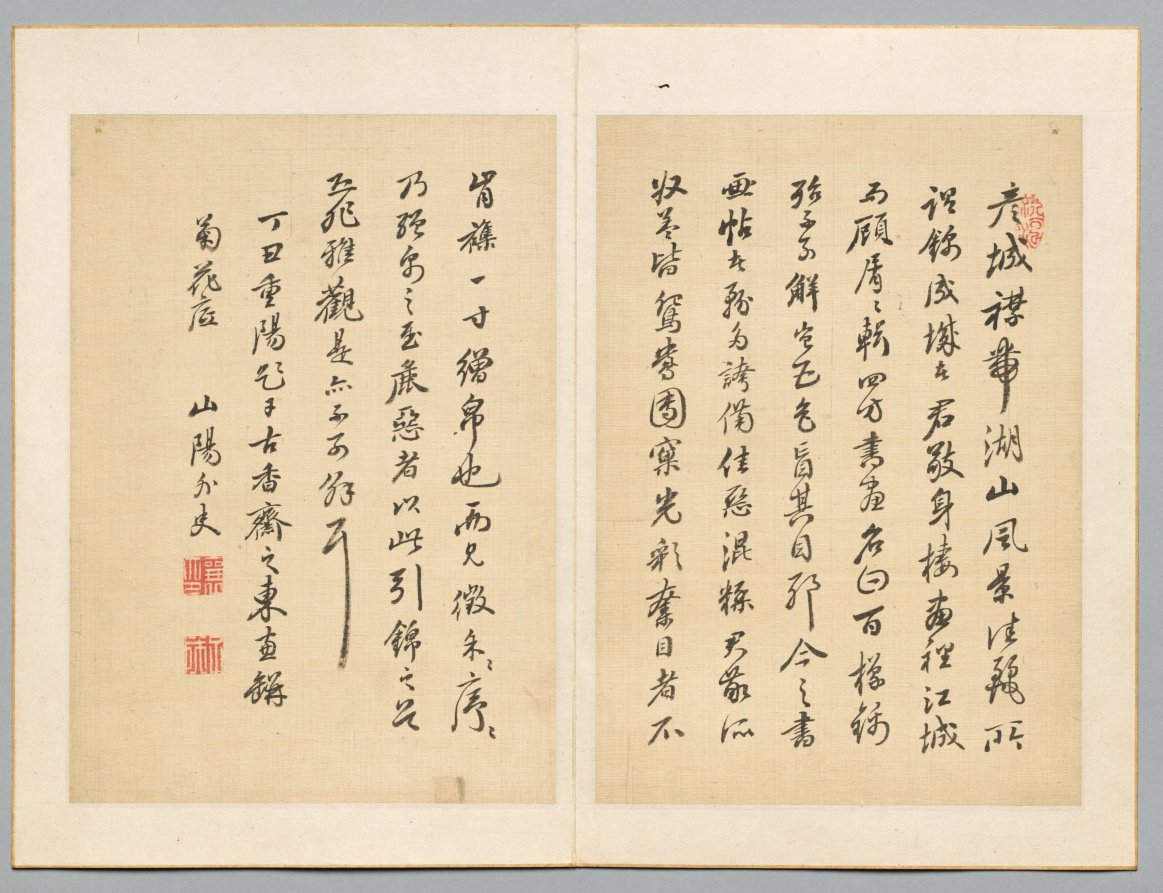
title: Preface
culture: Japan, Edo period (1615–1868)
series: Famous Early Modern Calligraphers and Painters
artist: Rai Sanyō (Japanese, 1780–1832)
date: 1817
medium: Double-leaf from a pair of folding albums; ink on silk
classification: Portfolio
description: Historian Rai San’yō, whose family came from Hiroshima and achieved elite samurai status from modest beginnings as textile dyers, contributed three calligraphies to these albums, including this preface, in which he explains that the albums were being assembled to show off the beauty of the landscape along Lake Biwa near Hikone Castle in central Japan. The albums also feature one leaf each by San’yō’s father, a scholar, and his two uncles, a physician and a scholar turned local government official.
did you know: From a samurai family, Rai Sanyō sought to evade training to be a bureaucrat, leading his father to lock him in his room for three years.